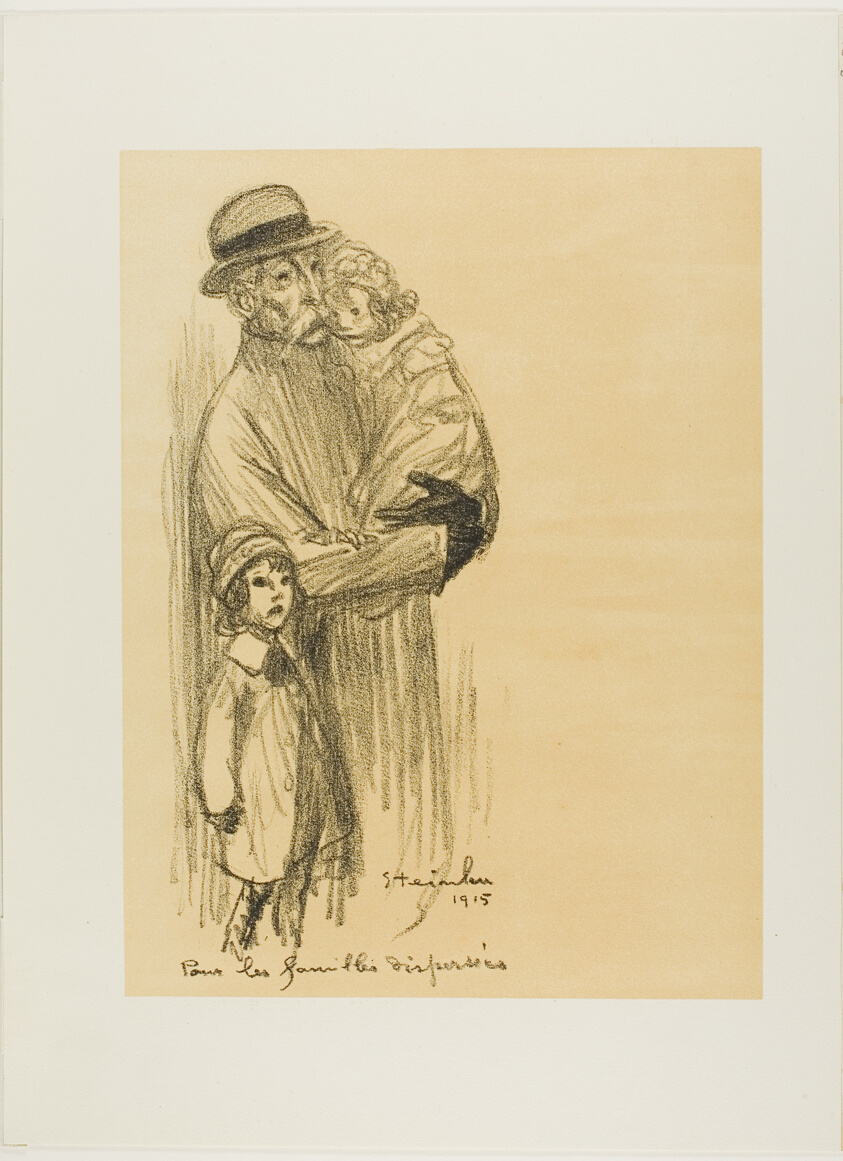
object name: Print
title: For Families That Are Separated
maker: Théophile-Alexandre Steinlen; French, born Switzerland, 1859-1923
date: 1915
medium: Lithograph in black over fawn tint on thick off-white wove paper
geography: France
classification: lithograph; print; prints and drawing